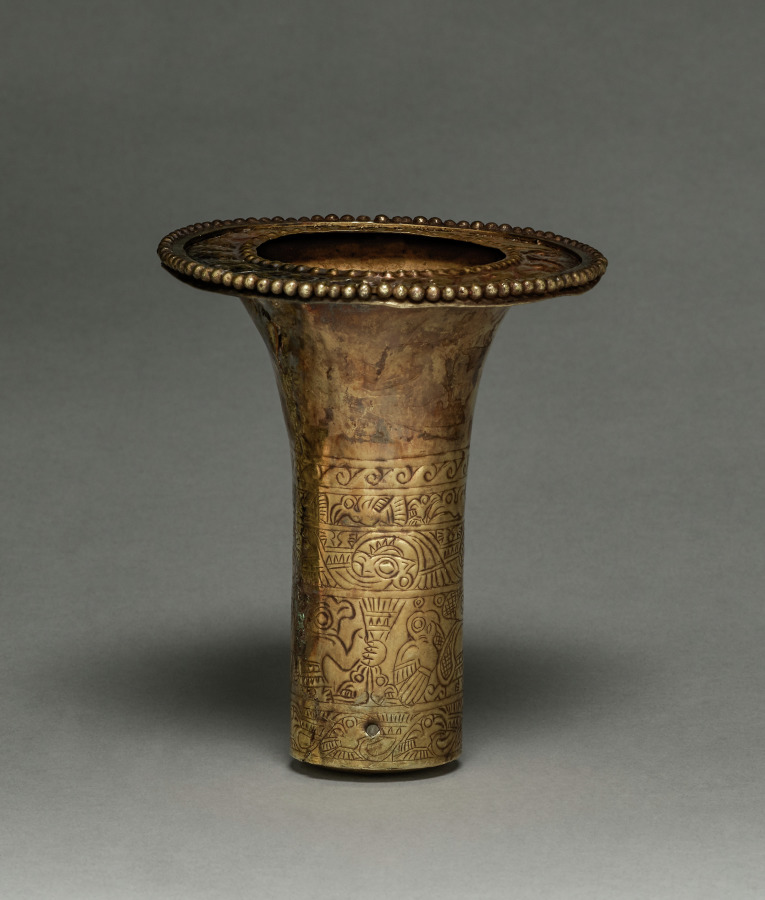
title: Ear Flare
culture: Peru, North Coast, Chimú style (900-1470)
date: 900–1470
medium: hammered gold alloy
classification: Metalwork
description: North Coast ear ornaments typically have a long shaft that balanced the weight of the glorious frontal. This pair illustrates Chimú interest in the sea, which had great economic and religious importance. On the shafts are bands of seabirds and waves, and a similar pattern edges the frontals, which were altered in modern times. Originally solid disks, the frontals' centers were cut out and a dotted band was added to the rim.